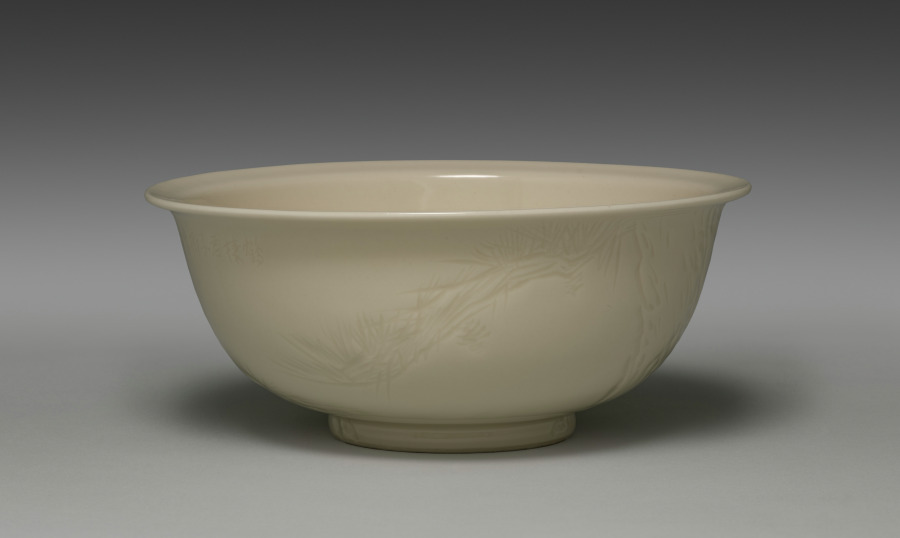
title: Bowl with Old Pine and Poem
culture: Japan, Taishō period (1912–26) or Shōwa period (1926–89)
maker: Seifū Yohei IV (Japanese, 1872–1951)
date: 1914–46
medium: Porcelain with molded and carved design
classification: Ceramic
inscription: 鶴樹君子風拂太平枝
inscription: 清風造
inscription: 清風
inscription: 成山清風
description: A grand, aged pine is carved into the body of this bowl. The inscription on the reverse side explains the tree’s presence. It is an altered version of two lines from a poem by Li Jiao (646?–715?) called “Pine.” Li Jiao was a senior government official who had a tumultuous career under the reign of Wu Zetian (r. 690–705), as well as those of her sons and grandson during the Tang dynasty (618–907). Although little known today, his work was read in Japan during the Heian (794–1185) and Kamakura periods (1185–1333). An anthology containing his poems, which was lost in China, was passed down across the generations in Japan. The translation of the inscription is as follows (the original characters, written and read from right to left, are shown below from left to right): The crane nests in the mastwood tree, the wind flicks at its peaceful branches. 鶴樹君子風拂太平枝 The mastwood is a pine-like evergreen, and the crane sheltering there is protected from the wind. In the original poem, the characters before “branches” (枝) are rather 大夫, meaning “high official.” This is likely a reference to the title bestowed upon a pine tree by the emperor Qin Shi Huang (r. 221–210 BCE) in thanks for its protection when a fierce rain fell as he ascended Mount Tai to pay his obeisance to the heavens.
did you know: The box inscription identifies the bowl's glaze as kanpakuyū, "bright-jewel white glaze."